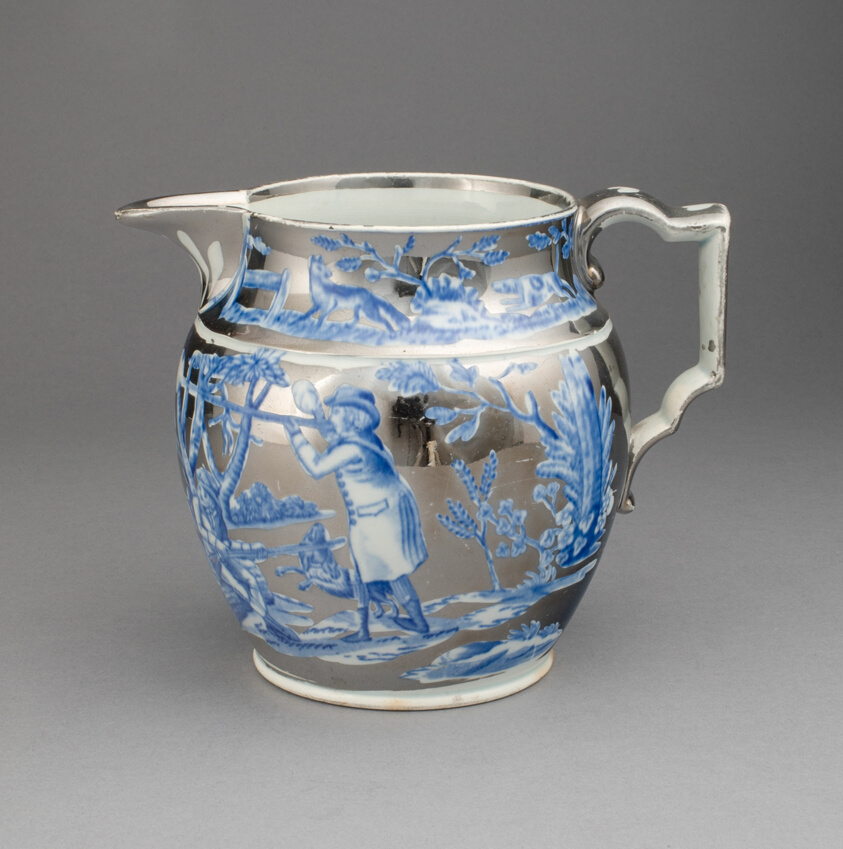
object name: Ceramics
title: Pitcher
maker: England, Staffordshire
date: 1810/20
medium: Lead-glazed earthenware with lustre decoration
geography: Staffordshire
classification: pitcher (vessel); earthenware; vessel; ceramics; european decorative arts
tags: dogs, animals